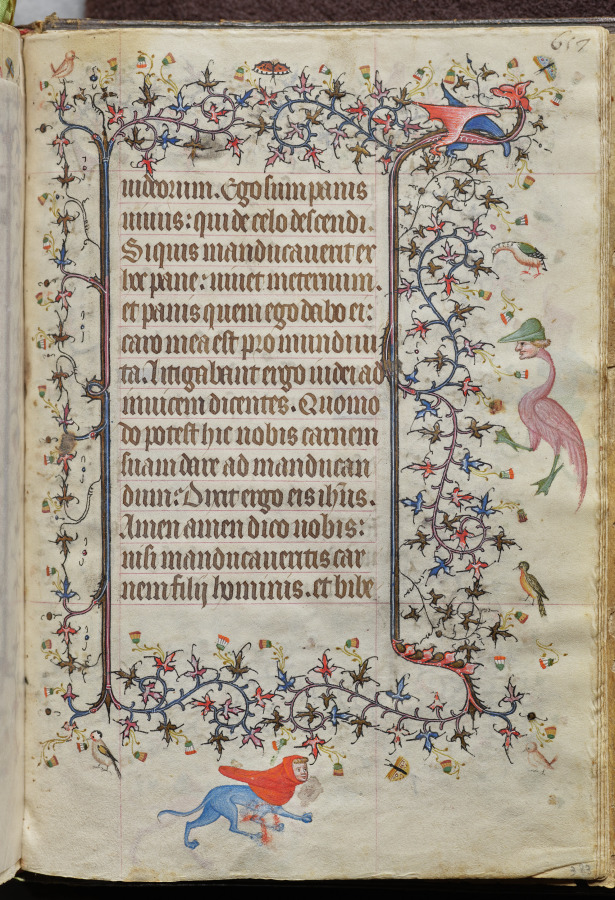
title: Hours of Charles the Noble, King of Navarre (1361-1425), fol. 323r, Text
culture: France, Paris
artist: Master of the Brussels Initials and Associates (French)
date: c. 1405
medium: ink, tempera, and gold on vellum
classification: Bound Volume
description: This precious volume was obviously highly prized by its owner, the French-born King of Navarre, who had his coat of arms painted on no less than twenty folios. Rather than directly commissioning this manuscript from a specific workshop, it seems that Charles the Noble acquired his book of hours -- perhaps ready-made for the luxury market -- while on a trip to Paris in 1404-05. A collaborative effort, six painting styles are evidenced within the pages of this codex, those of two Italians, two Frenchmen, and two Netherlanders. The painter who was responsible for the planning and decoration of the book, and who produced seventeen of the large miniatures, was a Bolognese artist known as the Master of the Brussels Initials. His principal assistant, responsible for most of the borders, was a Florentine who signed his name "Zecho" da Firenze on folio 208 verso.